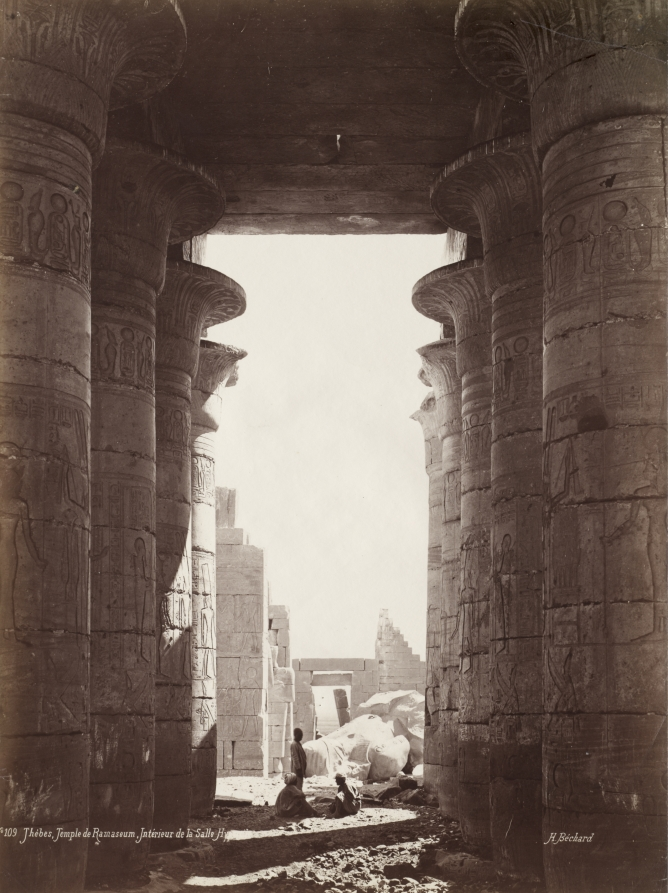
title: Thebes, Temple of the Ramesseum, Interior of the Hypostyle Hall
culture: France, 19th century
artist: Henri Béchard (French)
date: 1870s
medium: albumen print from wet collodion negative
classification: Photograph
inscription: Imprinted in white on recto: "(N appears to be partially cut off) No 109 Thebes, Temple de Ramaseum, Interieur, Interieur de la Salle Hypostile H. Bechard" Written in pencil on verso: "no 109"